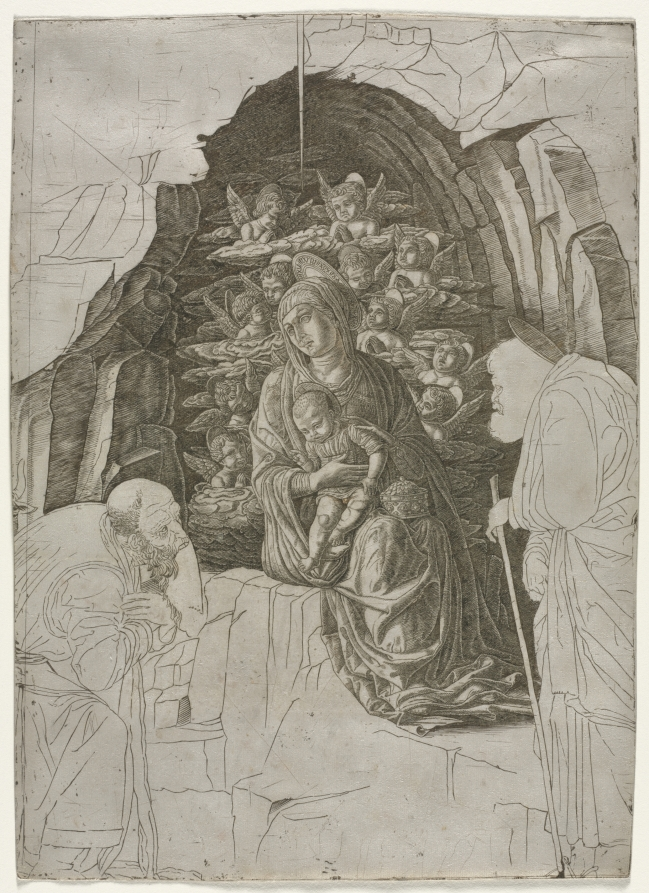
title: Virgin and Child in the Grotto (Adoration of the Magi)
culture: Italy, 15th century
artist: probably by Premier Engraver (Italian, active about 1500)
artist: workshop of Andrea Mantegna (Italian, about 1431–1506)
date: c. 1500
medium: engraving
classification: Print